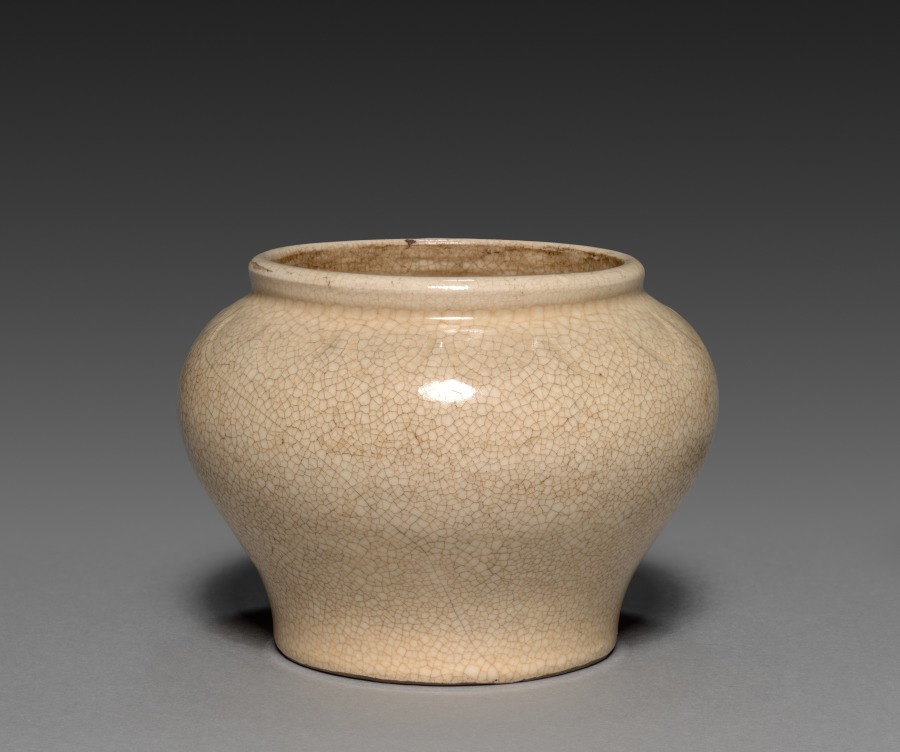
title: Jar (Satsuma ware)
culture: Japan, Meiji period (1868–1912)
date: 1868–1912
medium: pottery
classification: Ceramic